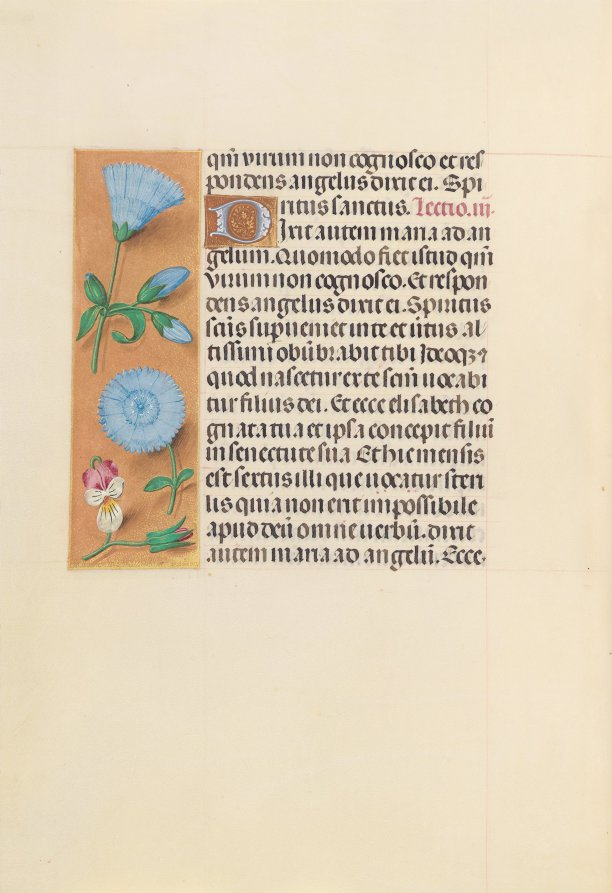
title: Hours of Queen Isabella the Catholic, Queen of Spain: Fol. 163v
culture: Flanders, Ghent and Bruges, late 15th century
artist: Master of the First Prayerbook of Maximillian (Flemish, c. 1444–1519)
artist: and Associates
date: c. 1500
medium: ink, tempera, and gold on vellum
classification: Bound Volume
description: This manuscript was illuminated by a circle of at least five highly organized manuscript painters active in the Flemish cities of Ghent and Bruges. The principal illuminator was Alexander Bening, who painted the majority of the book's miniatures. Manuscripts produced by this circle of artists are renowned for the decoration of their borders, which typically feature a rich variety of realistically-painted flowers, birds, and butterflies. This prayer book, called a book of hours, was intended not for a cleric, but for the private devotions of a lay person-in this case, Isabella the Catholic, Queen of Spain (1451-1504). Isabella's coat of arms embellishes the book's frontispiece. It is unlikely that the book was commissioned by the Queen herself; rather, she probably received it as a diplomatic gift from someone courting her patronage, perhaps Cardinal Francisco Jimenez de Cisneros. A Franciscan friar, Jimenez was dependent upon Isabella for his advancement, first to the post of Queen's confessor in 1492, and then to Archbishop of Toledo in 1495.